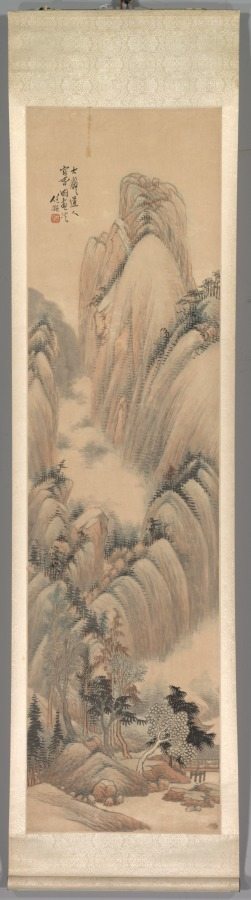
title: Landscape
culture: China, Qing dynasty (1644-1911)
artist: Ren Yu (Chinese, 1853–1901)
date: 1892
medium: Hanging scroll; color on paper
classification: Painting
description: This seasonal landscape is from a set of four hanging scrolls by Ren Yu. He was the youngest, most eccentric, and least prolific of the Four Rens, a family of prominent painters in Shanghai during the late Qing dynasty (1644–1911). Perhaps due to his opium habit and subsequent financial difficulties, Ren Yu tended to be lackadaisical in his work. The few remaining high-quality paintings hint at his artistic potential lost to opium. Though Ren’s premature death left his artistic promise unfulfilled, his paintings were acquired and donated to the museum by Charles Lang Freer (1854–1919), a wealthy businessman and art collector from Detroit. As Freer had hoped, this donation of Ren Yu paintings inspired the young Cleveland Museum of Art to continue to expand its own Chinese painting collection.